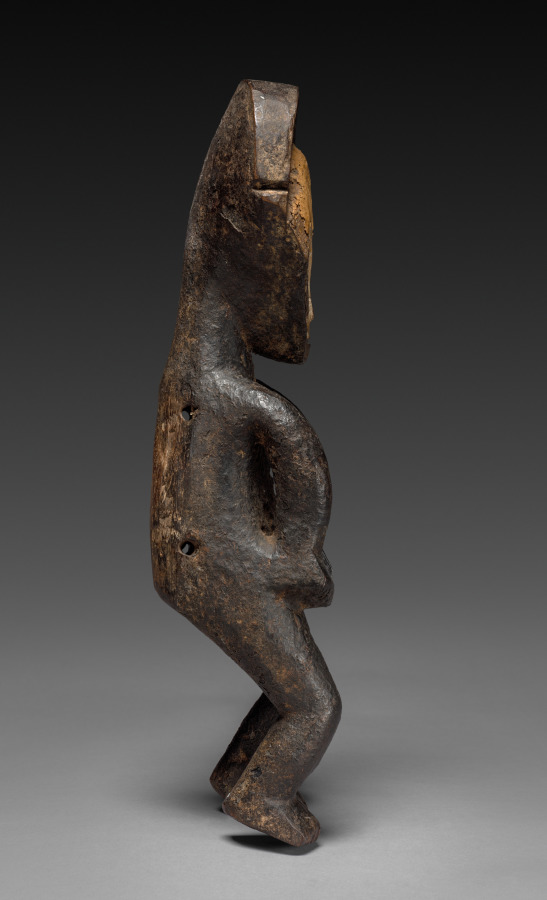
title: Male Figure (Ofika)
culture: Africa, Central Africa, Democratic Republic of Congo, Mbole-style carver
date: late 1800s or early 1900s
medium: Wood, colorant, and upholstery studs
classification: Sculpture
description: Figures such as this, known as ofika, were central to the initiation practices and the enforcement of laws among the all-male Lilwa association, a hierarchical organization that served educational, judicial, political, economic, and ritual functions among the Mbole. Meant to instill a moral code and to act as a cautionary symbol during initiation for Lilwa novices, ofika figures are believed to represent criminals who were ritually hanged for transgressions against Lilwa laws. The figure’s encrusted surface imitates how members covered their bodies with a substance made of ashes and palm oil during burial rites.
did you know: The stripe painted down the figure's torso represents the cord used for execution.